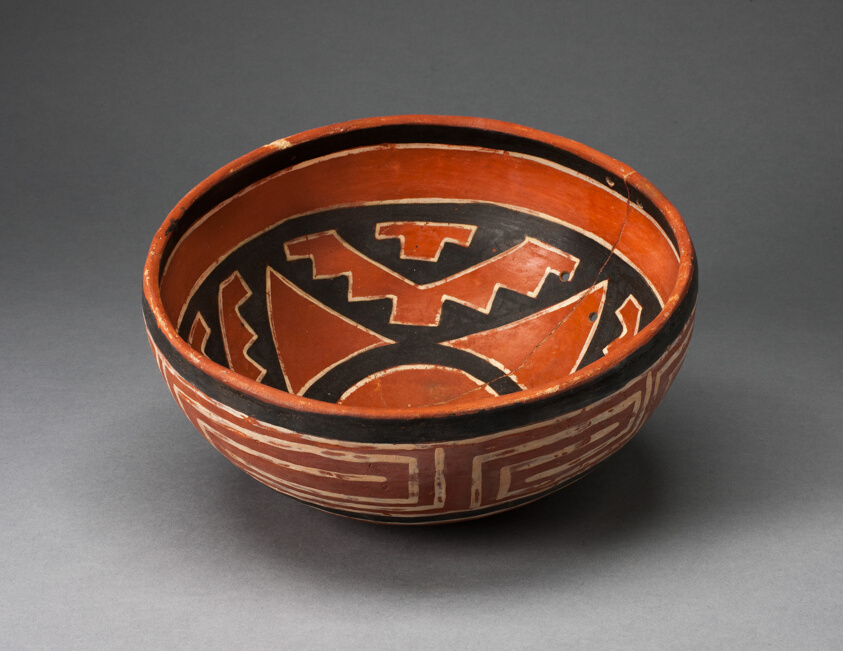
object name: Vessel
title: Polychrome Bowl with Geometric Star Motif on Interior and Interloking Scroll on Exterio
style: cibola, Pre-Columbian, americas, four mile polychrome, southwest, Arts of the Americas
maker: Cibola, Four Mile Polychrome; Cibola region, east-central Arizona, United States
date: 1300–1400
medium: Ceramic and pigment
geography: Arizona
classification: bowl; earthenware; ceramics; vessel; art of the americas